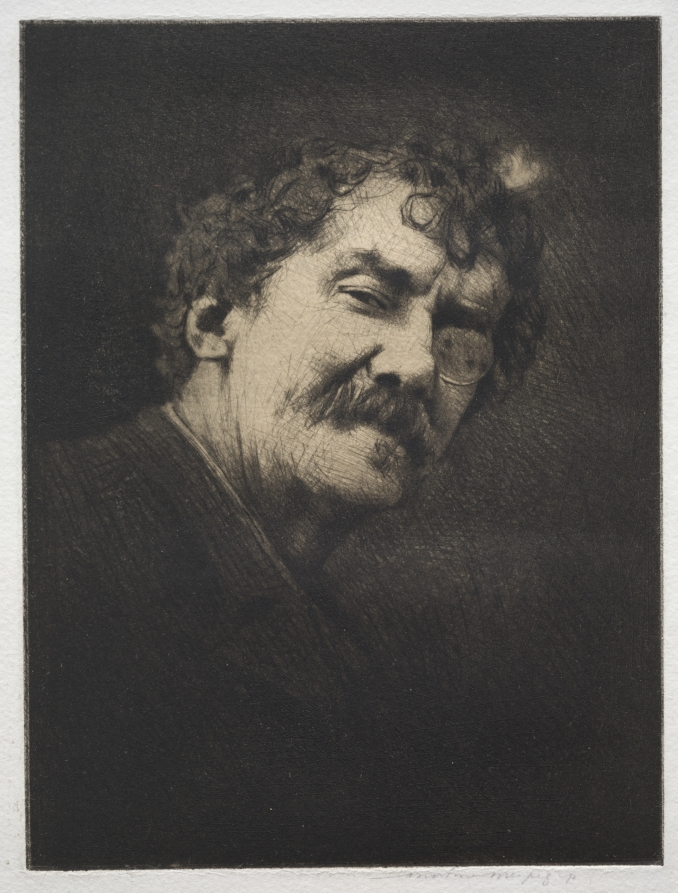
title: James MacNeill Whistler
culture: England, 19th century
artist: Mortimer Menpes (British, 1860–1938)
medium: drypoint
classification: Print